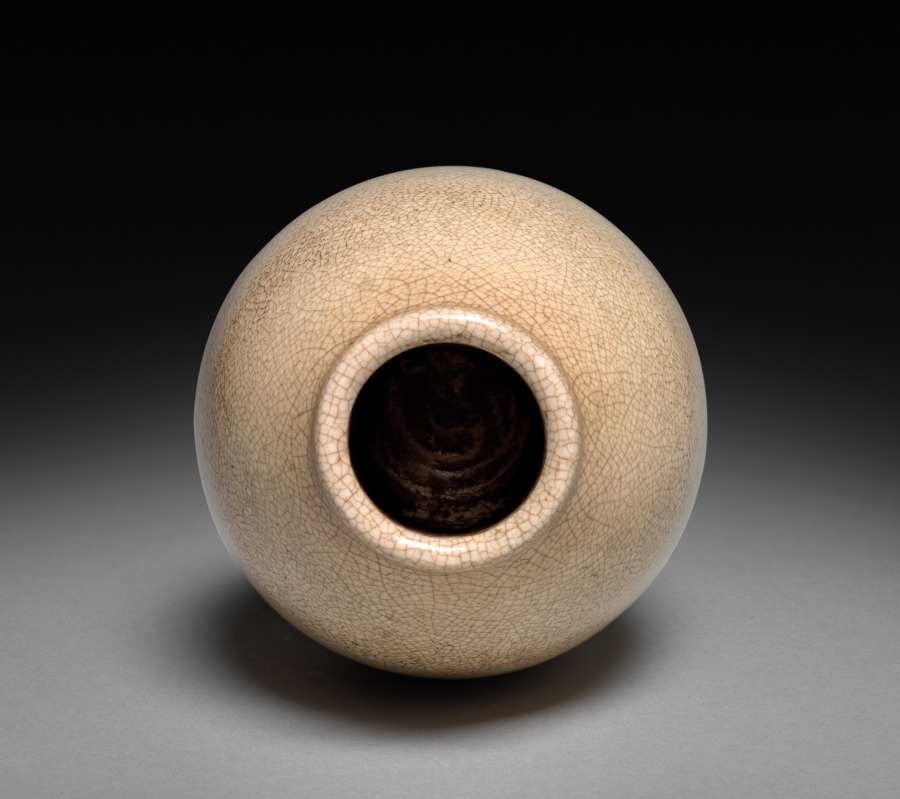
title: Vase: Dhong-ke Ware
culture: China, Ming dynasty (1368–1644)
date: 1368–1644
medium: white crackled stoneware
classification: Ceramic